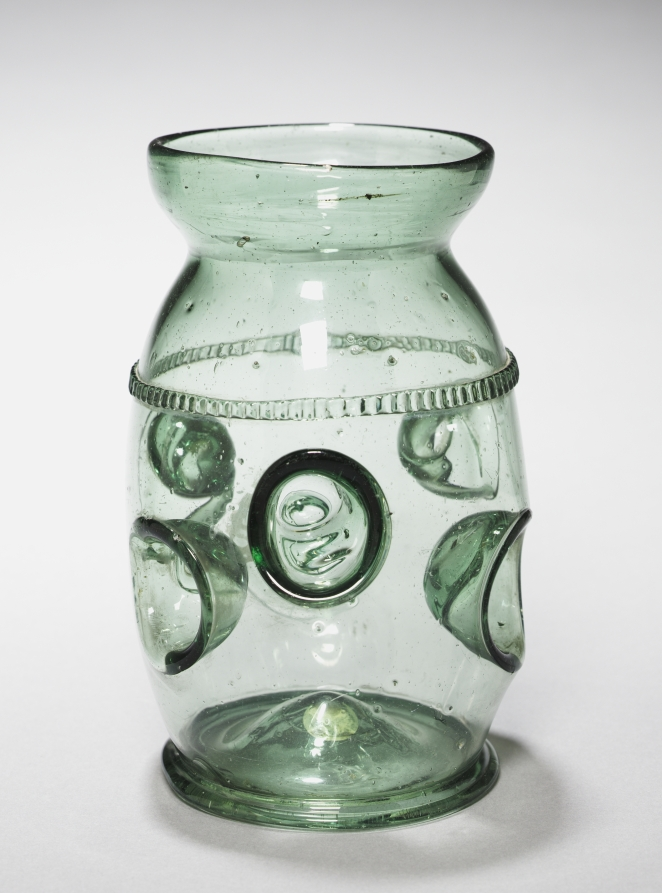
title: Tumbler (Daumenglas)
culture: Germany, late 16th-early 17th century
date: c. 1600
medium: green glass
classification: Glass